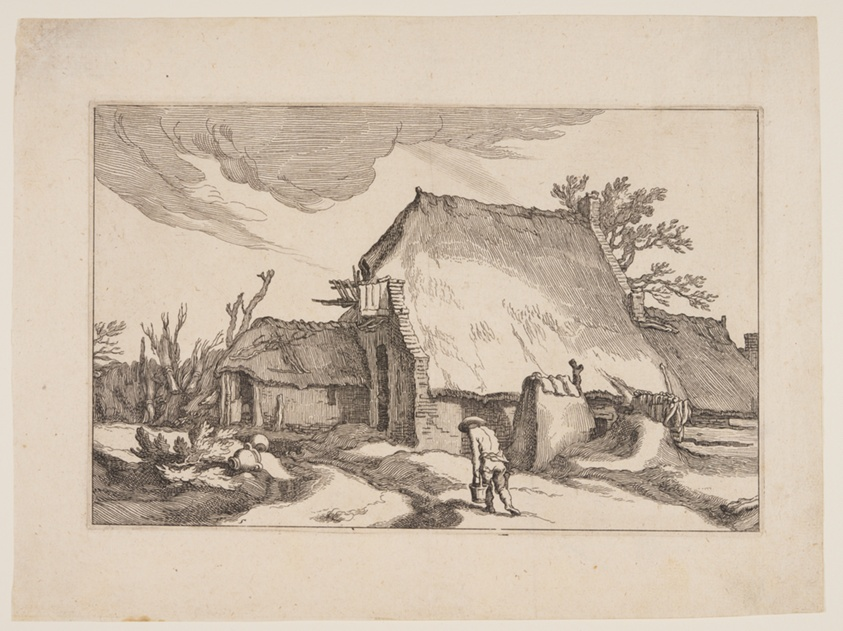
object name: Print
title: Plate 5, from Landscapes with Farmhouses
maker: Boëtius Adamsz. Bolswert (Flemish, 1580–1633); after Abraham Bloemaert (Dutch, 1566–1651)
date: 1614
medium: Etching on ivory laid paper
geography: Flanders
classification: print; paper; prints and drawing; etching